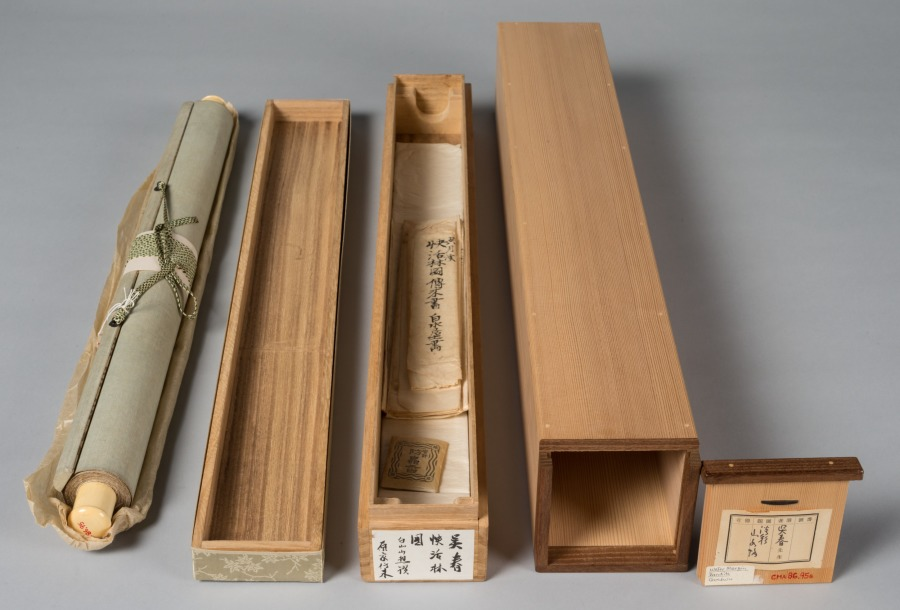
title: Happy Forest, from Water Margin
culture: Japan, Edo period (1615–1868)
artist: Matsumura Goshun (Japanese, 1752–1811)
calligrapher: and Amenomori Shōteki (Japanese, 1731–1786)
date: late 1700s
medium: hanging scroll; ink and color on paper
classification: Painting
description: The Chinese literary classic Water Margin is set in the 1120s and tells the story of 108 outlaws who first rebel against the government and then join forces with it. This painting depicts an episode in which hero Wu Song reclaims the tavern Happy Forest for its rightful owner, the prison warden’s son, Shi En. To prepare for the fight, Wu Song drinks a lot of wine. The painting was inscribed with a quote in which an ally describes Wu Song’s fighting style. It reads as follows: Where his twin fists rise, clouds and thunder roar, When his flying kick comes, wind and rain tremble.